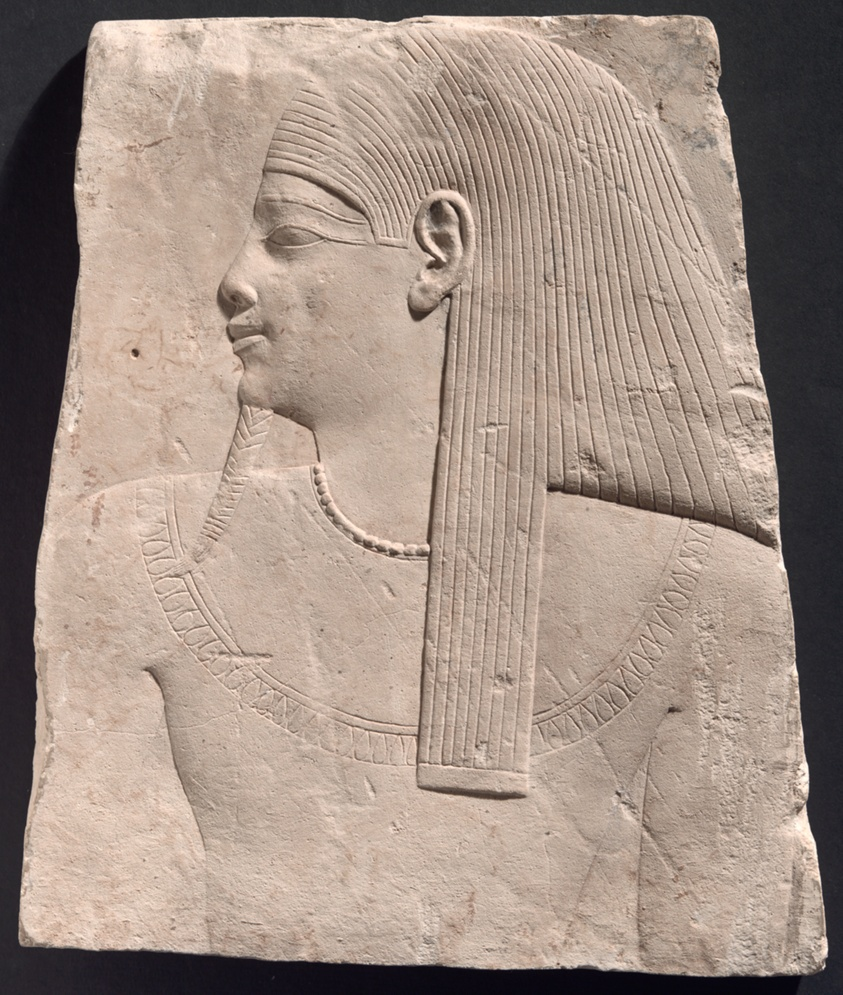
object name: Architectural fragment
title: Relief Depicting a God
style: ptolemaic, greco-roman (egyptian), ancient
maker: Egyptian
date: Ptolemaic Period (332–30 BCE)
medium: Limestone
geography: Egypt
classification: relief; stone; sculpture; ancient art; plaque (flat object)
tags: gods (deities)